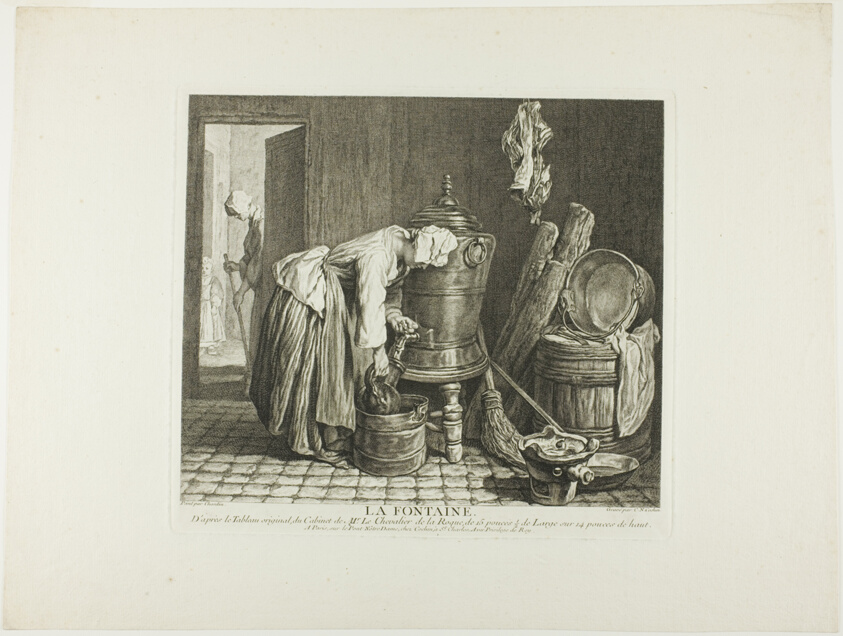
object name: Print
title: The Fountain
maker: Charles-Nicholas Cochin (French, 1715-1790); after Jean Baptiste Siméon Chardin (French, 1699-1779)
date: 1739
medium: Engraving on paper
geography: France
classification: engraving; print; prints and drawing